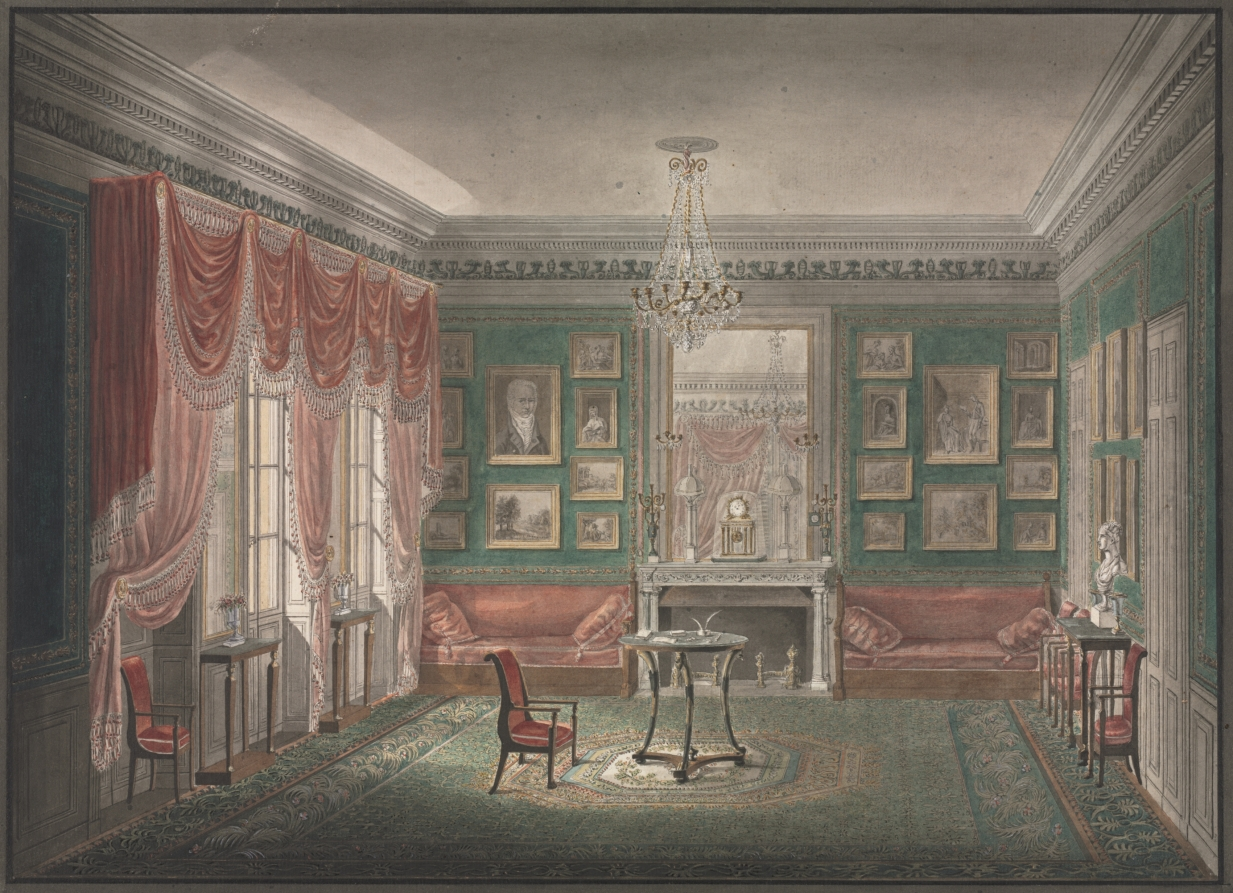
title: Interior View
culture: Russia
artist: Anonymous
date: c. 1805–10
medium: watercolor and pen and black ink heightened with white, shell gold, and touches of other opaque colors and with traces of graphite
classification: Drawing